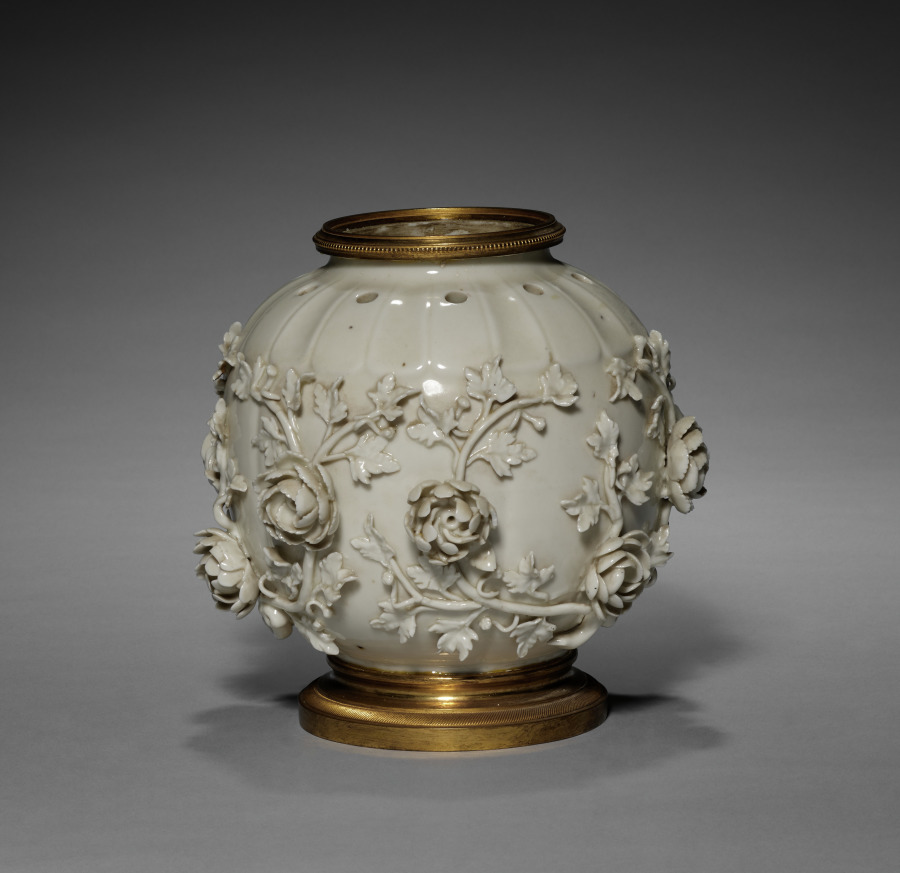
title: Potpourri Vase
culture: France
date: 1860–1880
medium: blanc-de-chine porcelain; gilt bronze mount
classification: Ceramic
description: This vase—part of a pair of covered vases—was created to contain potpourri, a mixture of flowers, herbs, and spices emitting ambient fragrance. This specific function offered a particularly fertile ground for the development of French porcelain from the mid-1700s, as manufactories experimented with forms, surface ornamentations, and placement of perforations. Produced by the firm of Edmé Samson in the 1800s, the vases pay homage to this history. While using updated technique and material, as well as more exuberant decorations, these vases draw upon designs by earlier innovators such as the Saint-Cloud manufactory.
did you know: Potpourri vases always have holes in the top to let the scent of dried spices and flowers contained within freshen the air around them.